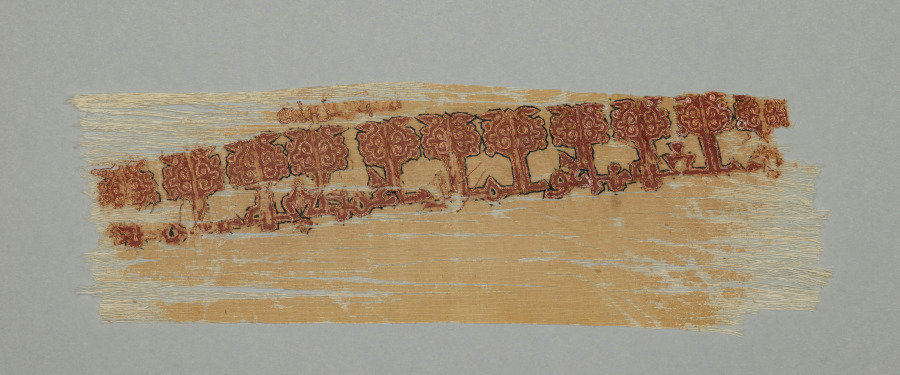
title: Fragment of an Embroidery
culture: Iran or Iraq, Seljuk period, 12 century A.D.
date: 1100s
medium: embroidery in silk and gold filé on mulham tabby ground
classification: Embroidery